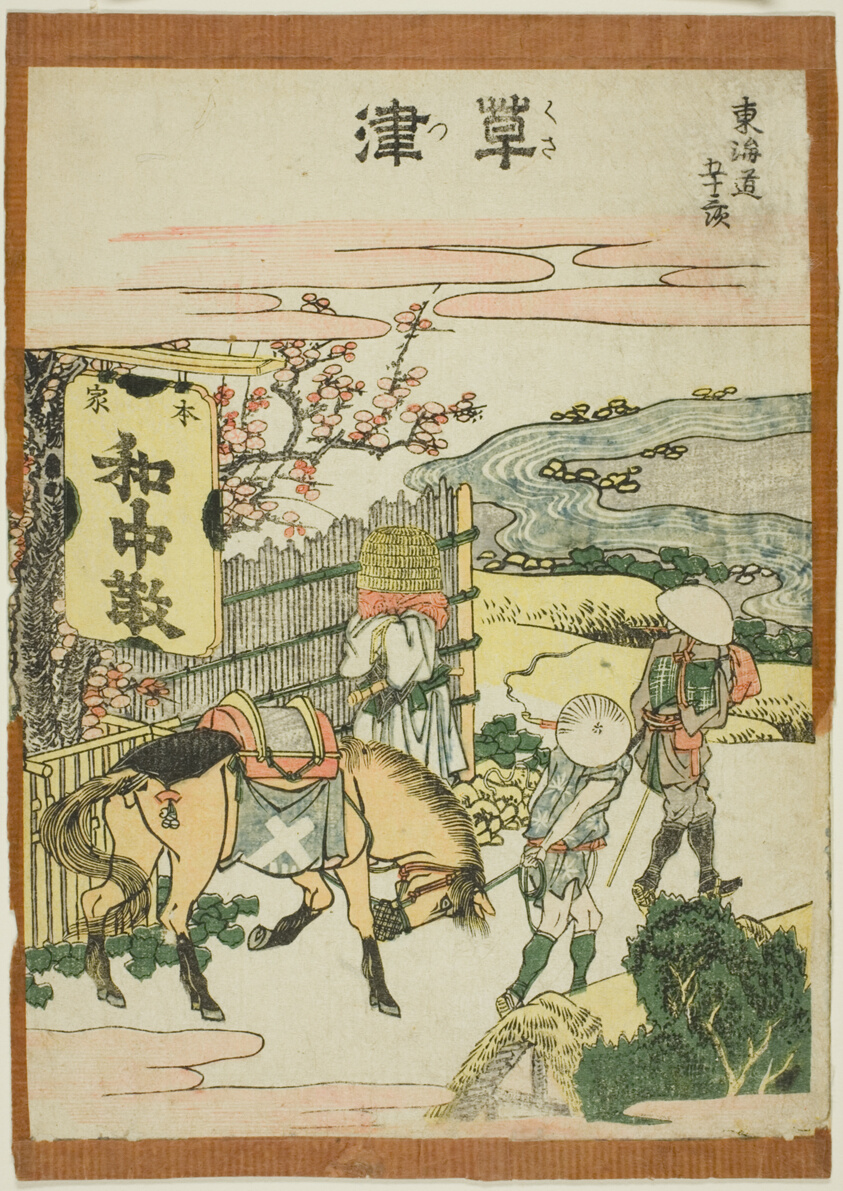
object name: Print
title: Kusatsu, from the series "Fifty-three Stations of the Tokaido (Tokaido gojusan tsugi)"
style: Japanese (culture or style)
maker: Katsushika Hokusai 葛飾 北斎; Japanese, 1760-1849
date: c. 1806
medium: Color woodblock print; chuban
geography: Japan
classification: woodblock print; print; asian art